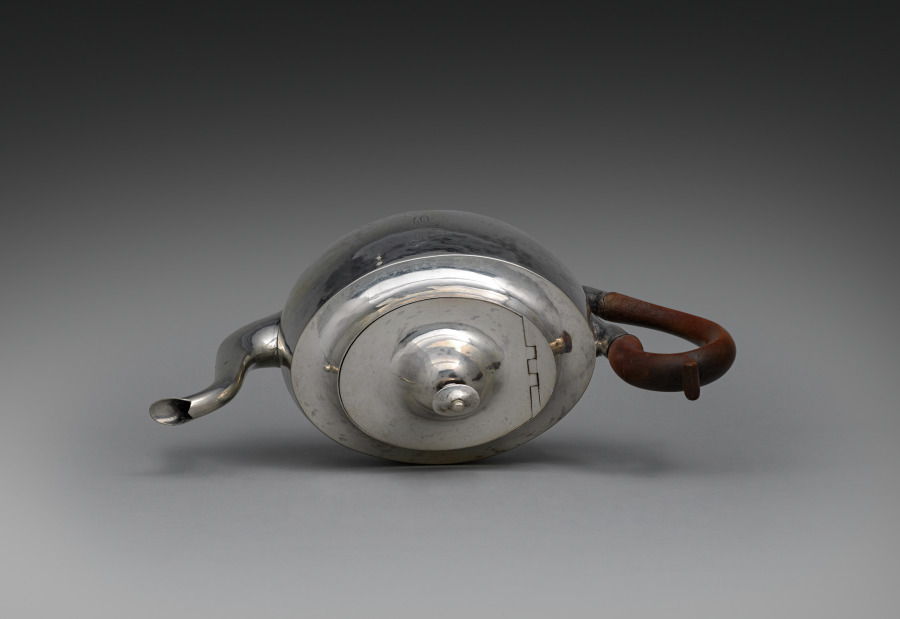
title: Teapot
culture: America, early 19th Century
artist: firm of Henry Farnam (American, 1773–1833)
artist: firm of Rufus Farnam (American, 1771-)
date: c. 1800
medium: silver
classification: Silver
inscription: engraved "AW/to/AW" in bright-cut script on side.